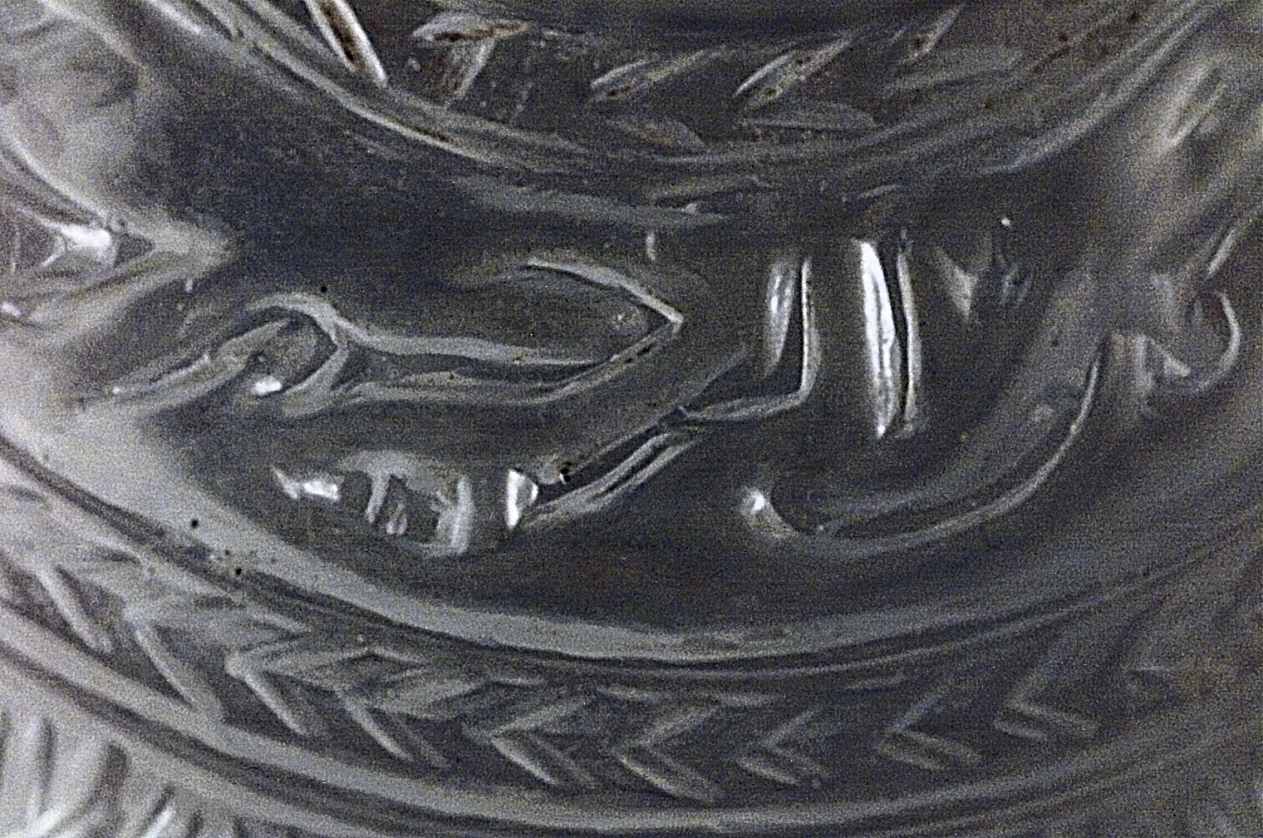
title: Hookah Bowl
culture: India, Mughal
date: 1700s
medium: glass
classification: Glass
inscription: Inscription in Farsi, on body: Even if live charcoal is placed on its head/ The hookah, a teacher of etiquette,/ will not respond unless drawn upon;/ Thus one can learn from its manners of refinement.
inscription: Inscription in Farsi, on shoulder: In the name of Allah the clement and merciful is the key to the wise treasure.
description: The inscription around the body of the base speaks to the use of the hookah in the decadent life of the Mughal court. The hookah is commended for being a proper, refined servant who will not “respond unless drawn upon” or, produce water bubbles when smoke is drawn through the hose. Undoubtedly the witty, poetic allusions would have been appreciated at banquets and other courtly gatherings. The use of wheel-cut glass for this hookah base may have been influenced by English glass and lead crystal that was exported to India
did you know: Around the top of this hookah bowl are incised the opening two lines from the Khamsa (Quintet) of the celebrated Persian poet Nizami (1141–1209).